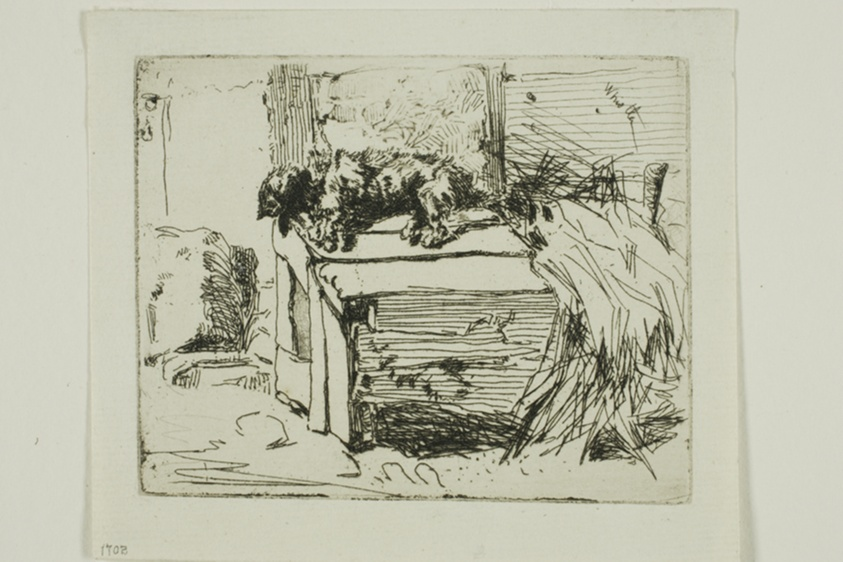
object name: Print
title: The Dog on the Kennel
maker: James McNeill Whistler (American, 1834-1903)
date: 1858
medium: Etching in black ink on off-white laid paper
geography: United States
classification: etching; print; prints and drawing; paper